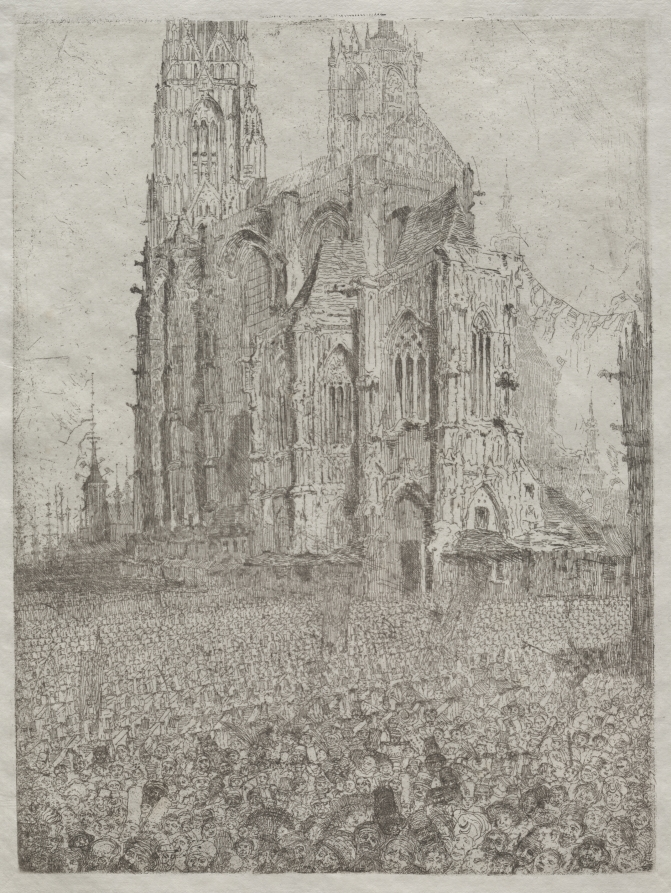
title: The Cathedral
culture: Belgium, 19th century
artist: James Ensor (Belgian, 1860–1949)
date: 1886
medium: etching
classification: Print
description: James Ensor used tiny, repetitive marks possible with etching to develop a new, expressive style that contrasted with that of most of his contemporaries. The Gothic architecture, worn facade, and overwhelming scale of the cathedral seen here in exacting detail show that it has withstood the test of time. Ensor juxtaposed the building with a dense crowd of grotesque figures that push forward seemingly irrationally, presenting a symbolic contrast between their whims and the permanence of both the church and the past.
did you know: This etching was Ensor’s most popular, and he eventually issued it in two versions; the Cleveland Museum of Art's rare impression is among the first that he printed.